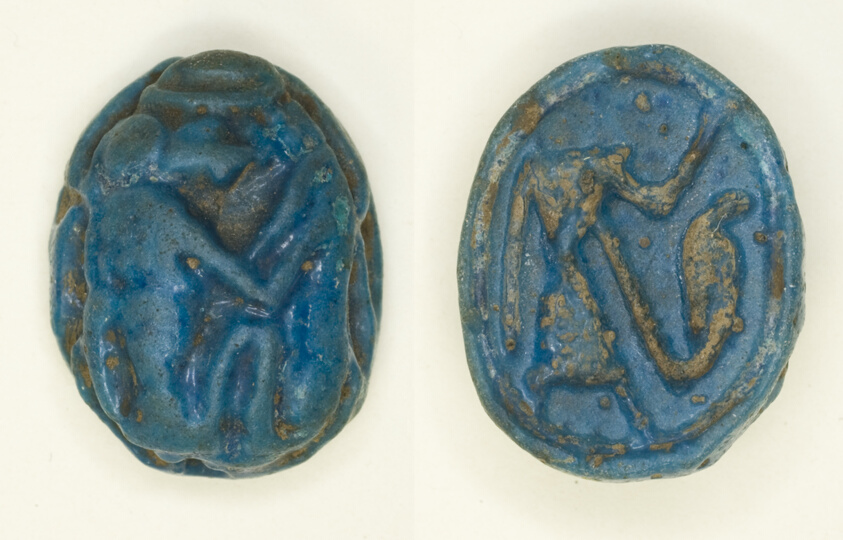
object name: Costume and Accessories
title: Scaraboid: Thoth as a Baboon with Lunar Crescent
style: new kingdom, ramesside period, ancient, egyptian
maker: Egyptian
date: New Kingdom, Dynasties 19–20 (about 1295–1069 BCE)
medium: Faience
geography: Egypt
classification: scaraboids; amulet; ancient art; costume; faïence (composite material)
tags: baboon, moon, snakes, serpents, men, deities, gods (deities)